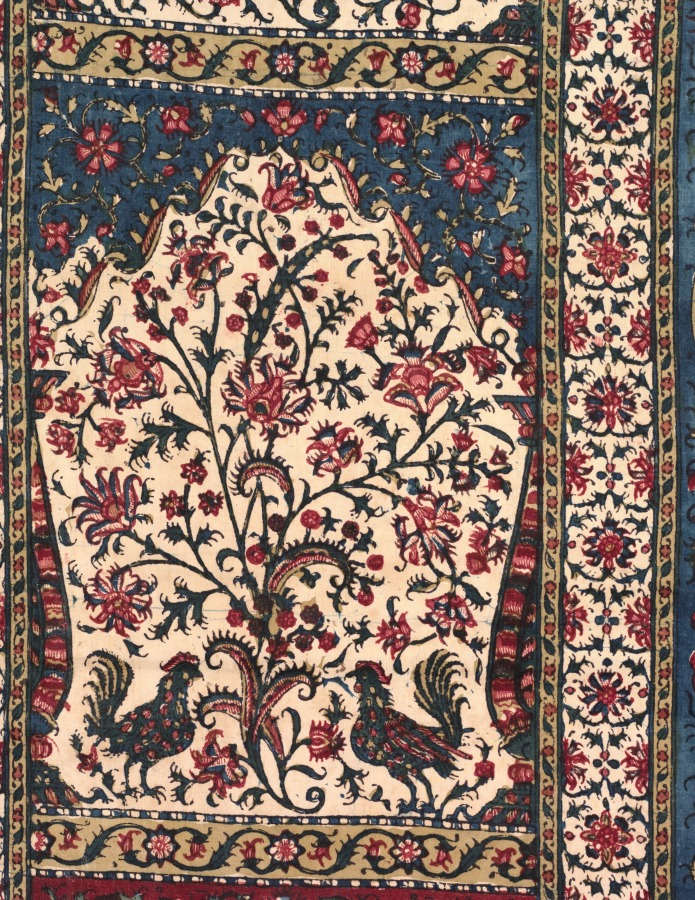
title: Chintz door curtain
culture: Iran, Isfahan, Qajar period (1779–1925)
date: 1800s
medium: Cotton: plain weave; chintz; hand drawing and block printing: bleach, mordant, and dye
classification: Textile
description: Lightweight white cotton cloth was transformed into this beautiful chintz, admired for its vibrant and durable colors, stunning pattern, fine quality, and rarity. Peacocks and a variety of birds appear amid vines with fanciful blossoms in the niche field and main border. Striking end borders feature blossoms in leaf-outlined diamonds on alternating ground colors of white, mustard, red, and blue. The complex chintz technique involving hand drawing, block printing, bleach, mordant, and dyes was developed in India. By the 1600s and 1700s, chintz was designed to target European and Asian markets and often featured large tree-of-life patterns. Chintz was also made in Iran by the 1400s, but this rare door curtain from the 1800s is among the oldest known examples.